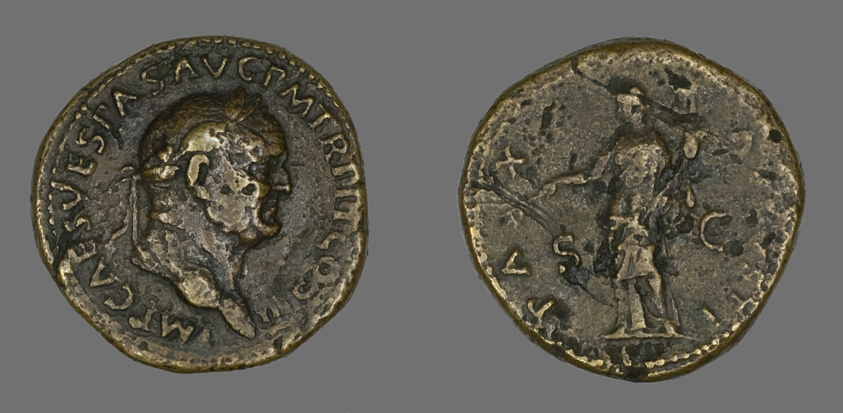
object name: Coin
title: Sestertius (Coin) Portraying Emperor Vespasian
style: roman (ancient, style or period), ancient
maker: Roman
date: 71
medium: Bronze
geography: Roman Empire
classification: coin; ancient art